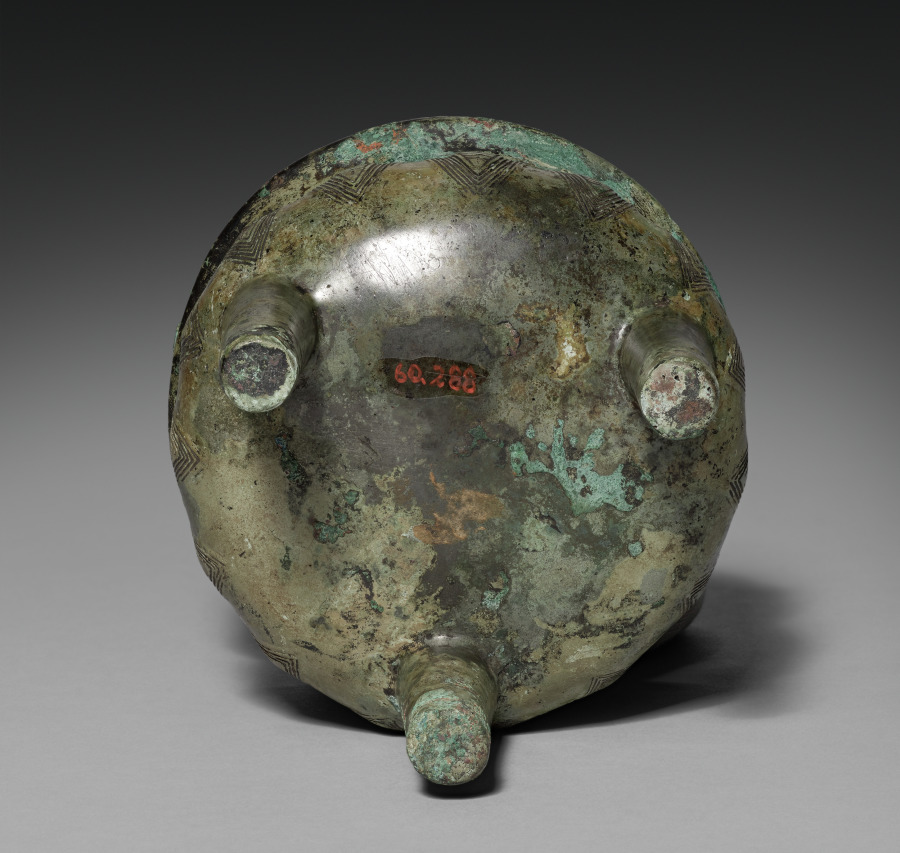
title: Tripod Cauldron (Ding)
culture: China, Shang dynasty (c. 1600–c. 1046 BCE)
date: 1200–1100 BCE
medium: bronze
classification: Metalwork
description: In ancient China, bronze tripods of the type called ding were made in sets of different sizes to be used in rituals in which grain and meat was offered to the spirits of the ancestors. These bronzes were subsequently both collected items and major scholarly preoccupations in Chinese history. They were prized art treasures that provide source materials for Chinese historiography and antiquity studies. Catalogues of archaic bronzes have been published since the Song dynasty. Scholars studied the bronze inscriptions, typologies, and terminologies, and these studies exerted an impact in the field well before the birth of modern art history and archaeology.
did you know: The vessel shows a band of silkworms and cicadas in two registers.